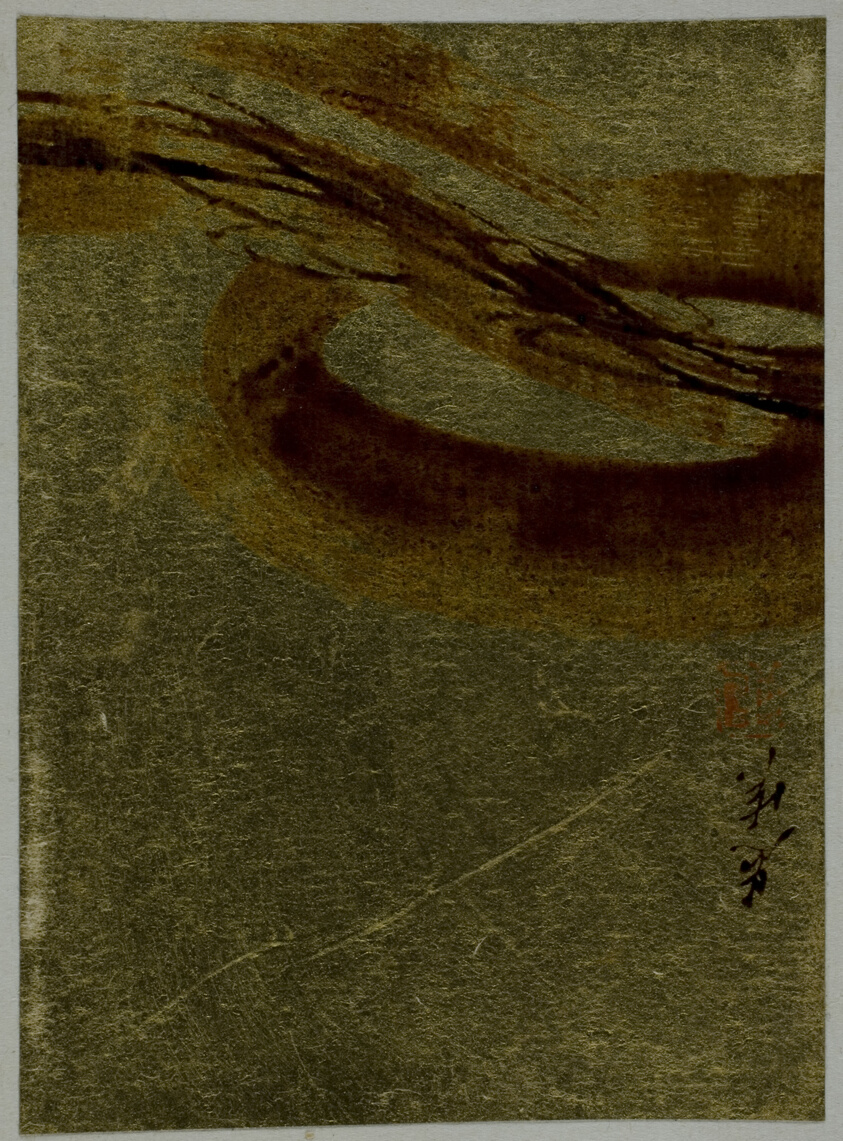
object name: Painting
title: Calligraphy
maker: Shibata Zeshin (Japanese, 1807-1891)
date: Meiji period (1868–1912)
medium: Album leaf, inks and color on paper.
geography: Japan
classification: album leaf; album/sketchbook; asian art; painting